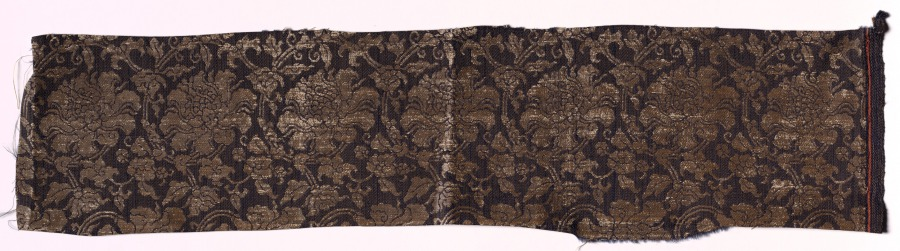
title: Textile Fragment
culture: Japan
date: 1800s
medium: silk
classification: Textile